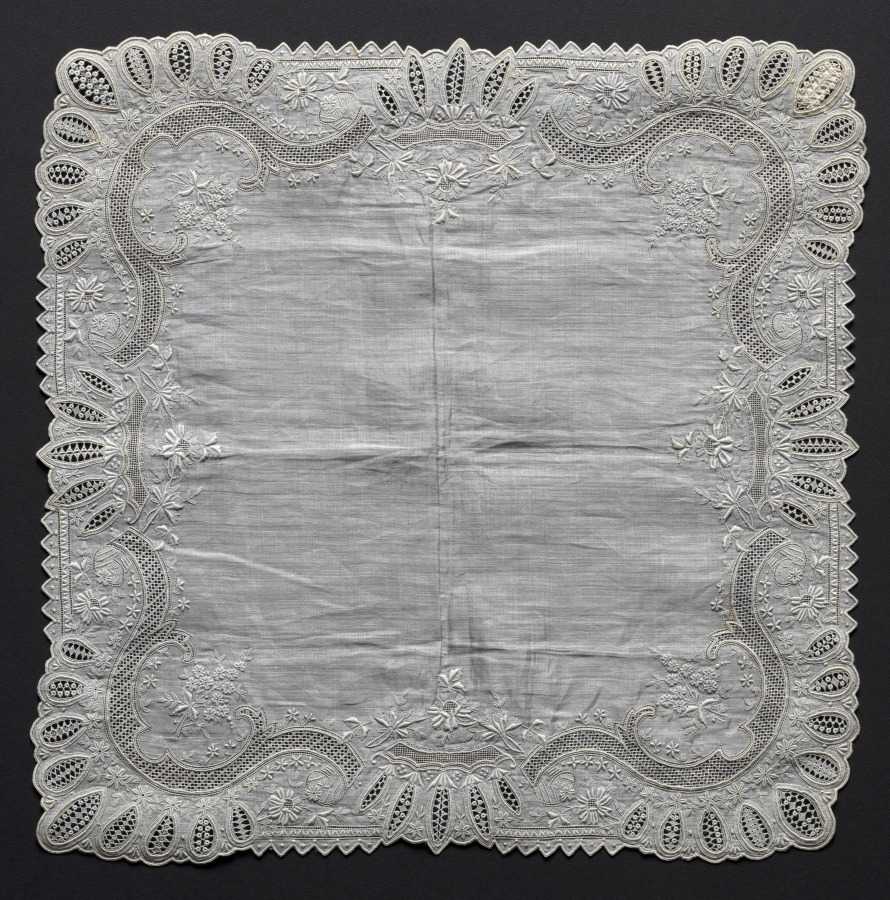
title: Lace Handkerchief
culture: Switzerland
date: 1800s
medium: Plain weave linen: needle lace (drawnwork) and embroidery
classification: Embroidery